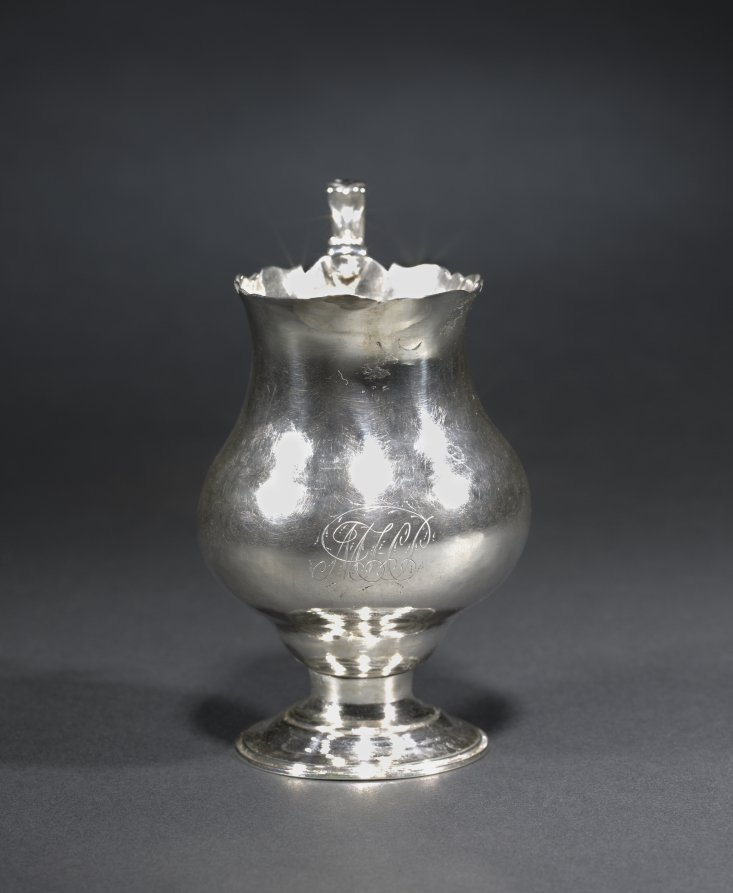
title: Cream Pitcher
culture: America, Massachusetts, Boston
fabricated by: Paul Revere II (American, 1735–1818)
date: c. 1765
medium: silver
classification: Silver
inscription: "P . . .H/to/P . . .E" in block letters under foot, and "MHP" in bright-cut script on front, opposite handle.